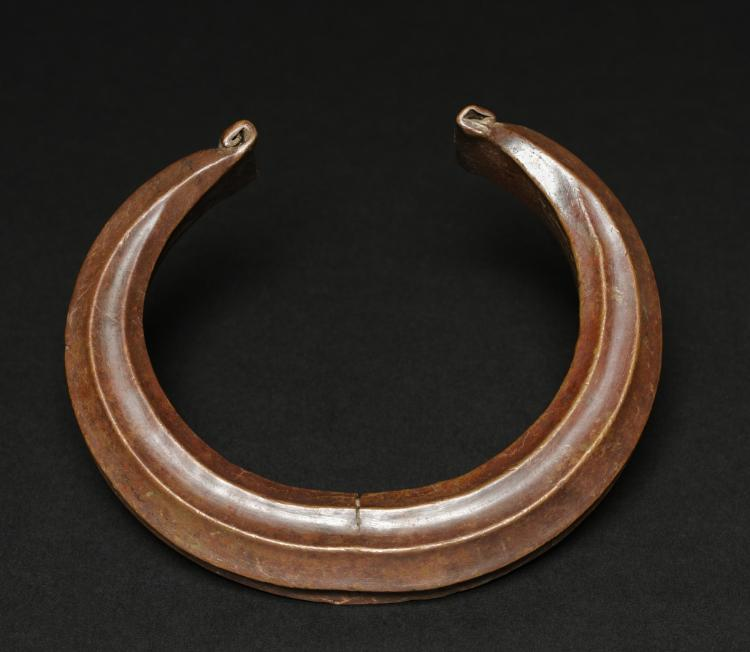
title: Neck Ring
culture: Africa, Central Africa, Gabon, Fang-style maker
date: 1900s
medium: Copper alloy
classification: Jewelry